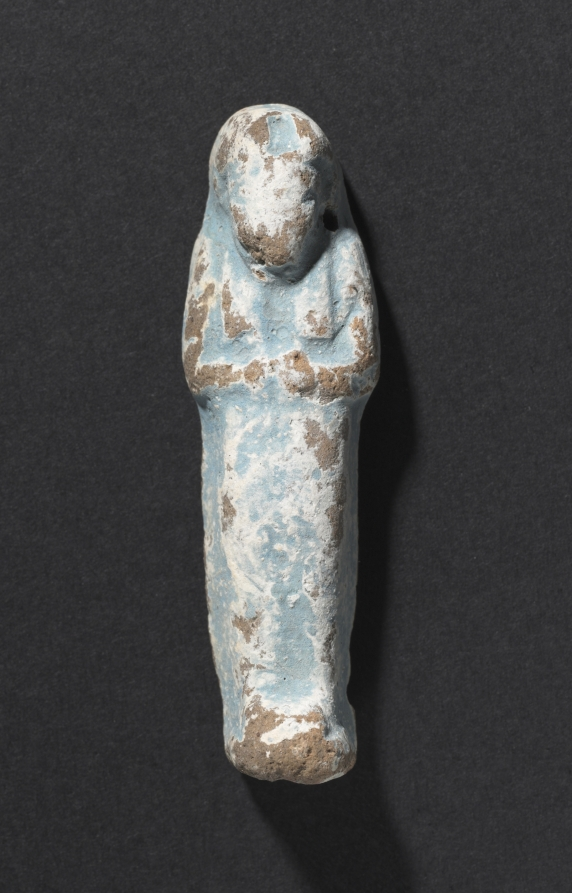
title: Shawabty of Ditamenpaankh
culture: Egypt, Late period (715–332 BCE), Dynasty 25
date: 715–656 BCE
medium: terracotta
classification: Funerary Equipment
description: High demand for shawabtys in the Late Period, a time when as many as 400 or more shawabtys were placed in the tomb with the deceased, gave rise to a specialized container for storing them: the shawabty box. This example is inscribed for the lady of the house, Ditamenpaankh, and was probably one of a pair originally made for her. The single-masted boat on the box's lid is perhaps an allusion to the pilgrimage of the deceased to the holy city of Abydos, the cult city of Osiris, king of the dead. The shawabtys inside are crude, mass-produced examples cast in an open mold. Made of terracotta, their blue paint imitates more costly shawabtys made of faience. As for the shawabty spell, it has been removed from its traditional location on the shawabty's front and relocated onto the sides of box, where it needed only to be written once, thus expediting production.